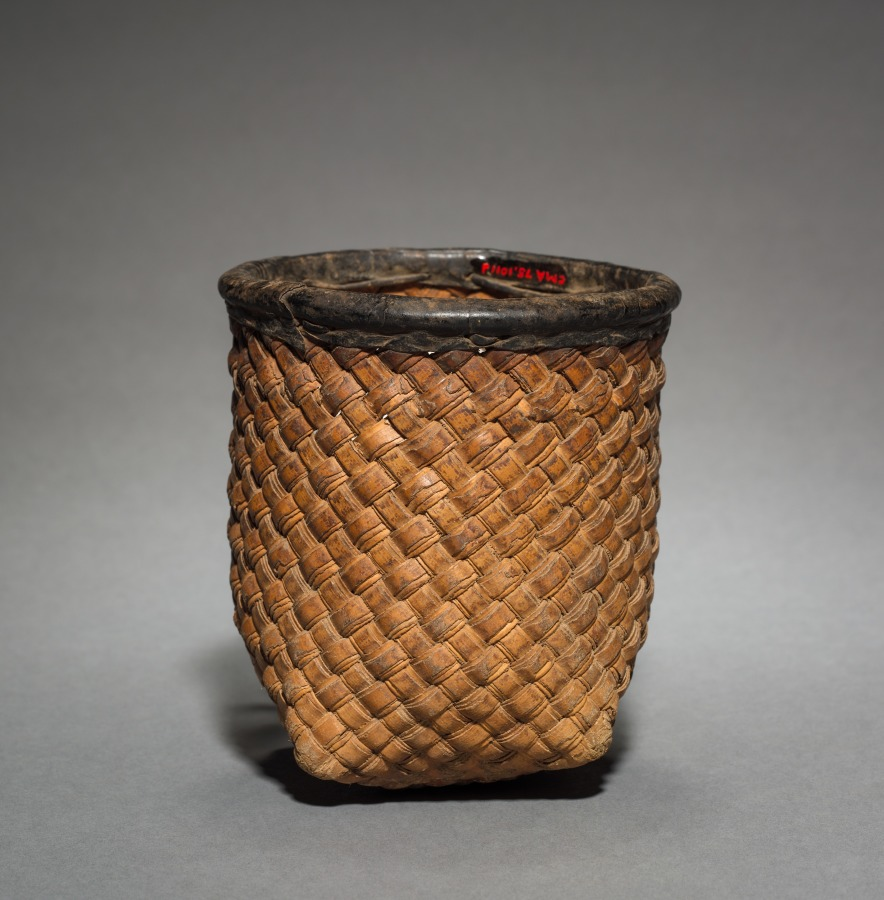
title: One of Ten Nesting Wedding Baskets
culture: Africa, Western Africa, Burkina Faso, Lobi–style maker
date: c. 1900s?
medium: Plant fiber and leather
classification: Vessels